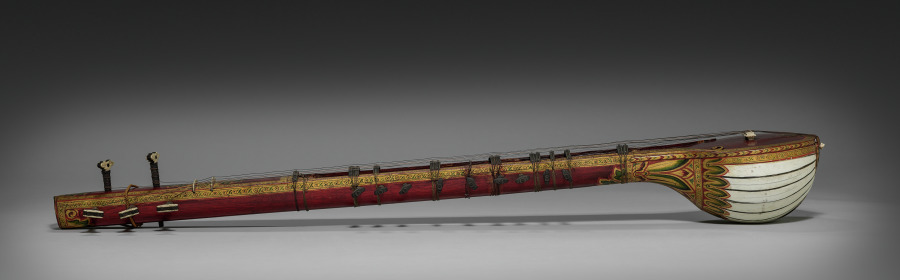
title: Sitar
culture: Eastern India, Bengal or Bangladesh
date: c. 1850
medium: Gourd and wood with pigment, ivory, and bone; copper alloy: frets; iron alloy: strings (with one modern copper replacement)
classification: Musical Instrument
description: The stringed instrument known as the sitar usually provided the central sound for the musical performances that were a constant feature of court life in India. The sitar could then be accompanied by percussion, voice, and other supporting instruments. In Raja Deen Dayal’s photograph Maharaja of Rewa in Prayer (2016.266.21), a musician strums a sitar in order to please the deities on the royal altar. The improvised compositions are played in a mode, or key, that correlates to the time of day and season of the year.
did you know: Many paintings of Indian court life depict female musicians holding and playing this kind of lightweight stringed instrument.